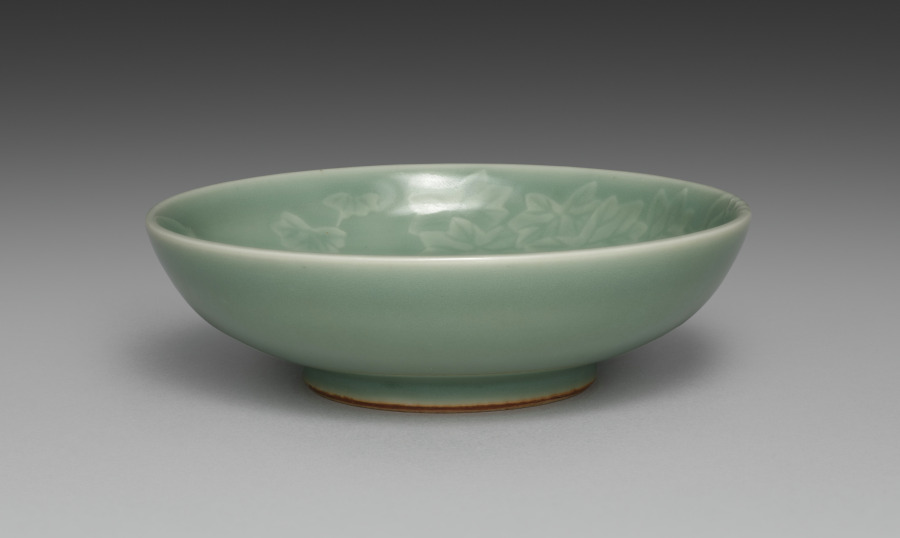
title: Dish from Dishes with Ivy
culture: Japan, Meiji period (1868–1912)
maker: Seifū Yohei III (Japanese, 1851–1914)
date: 1893–1914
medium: One from a set of five dishes; porcelain with green glaze and molded designs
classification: Ceramic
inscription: 清風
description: Yohei III’s main output for his sophisticated clientele was in the form of tea sets and dining sets. He often produced in pairs, sets of five, or sets of ten. This set of five dishes with a green glaze and designs of ivy vines in very low relief has unfortunately lost its box. These dishes are slightly larger than the other dishes, like CMA 2022.187, and so may have been not saucers but rather small plates for meals.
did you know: In his career, Seifū Yohei III created a range of dishes in green glazes.